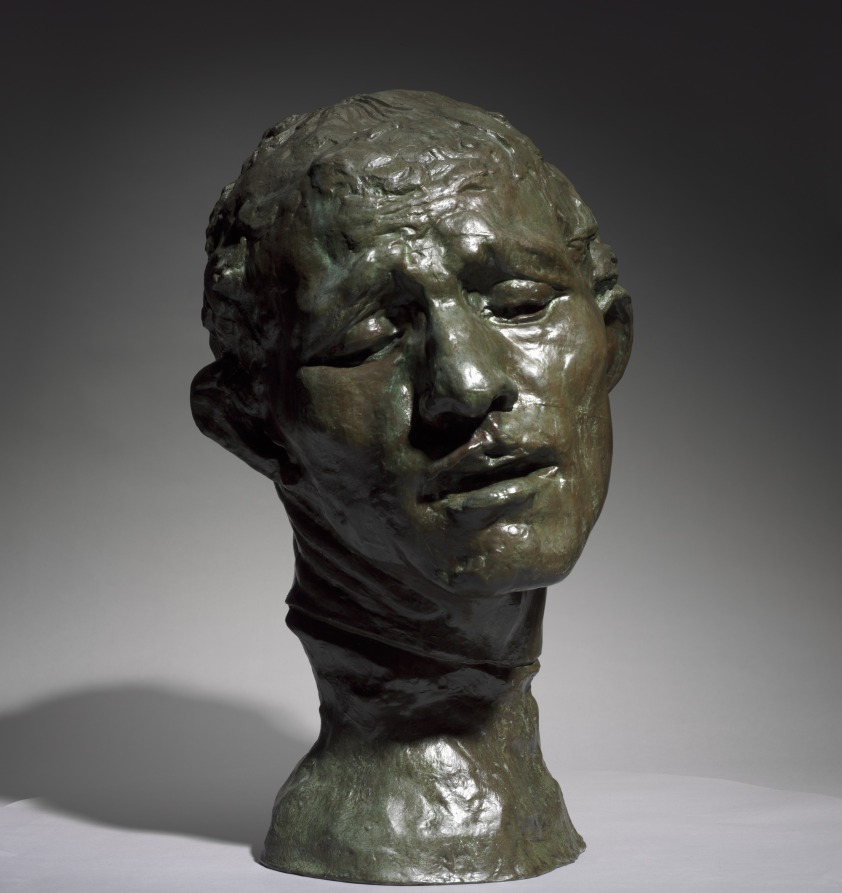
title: Heroic Head of Pierre de Wissant, One of the Burghers of Calais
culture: France, 19th century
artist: Auguste Rodin (French, 1840–1917)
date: 1886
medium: bronze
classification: Sculpture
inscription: inscribed at neck, left: A.Rodin; inscribed lower back: Alexis Rudier/Fondeur-Paris.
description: This sculpture depicts one of the figures in Rodin’s large public monument The Burghers of Calais (1884–89), featuring six French men who volunteered to be taken prisoner by the English in exchange for lifting the siege of Calais during the Hundred Years War (1337–1453). Pierre de Wissant’s anguished expression suggests extreme mental suffering as he contemplates his expected execution. Rodin exhibited a life-size version of the figure as an independent work before completing the monument. He later made multiple versions in various sizes and media.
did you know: This sculpture depicts the head of a figure from Rodin's large public monument The Burghers of Calais (1884-89). The CMA also owns a plaster version of the head.